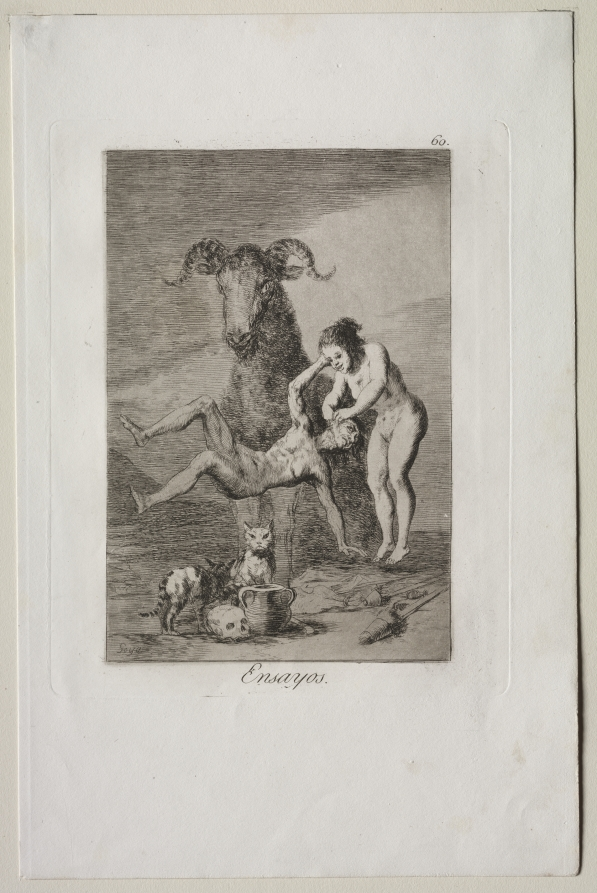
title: Trials, Plate 60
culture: Spain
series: Los Caprichos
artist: Francisco de Goya (Spanish, 1746–1828)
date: 1799, printed c. 1855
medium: etching and aquatint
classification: Print